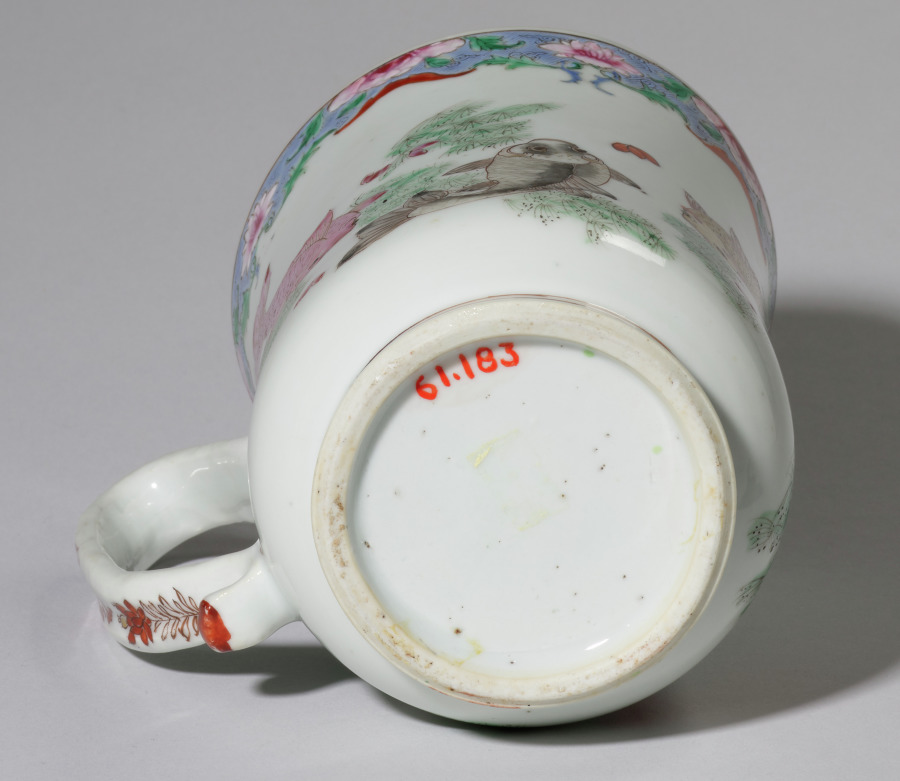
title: Mug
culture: China, Chinese Export -- European Market, 19th century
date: c. 1800–1825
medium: porcelain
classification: Ceramic